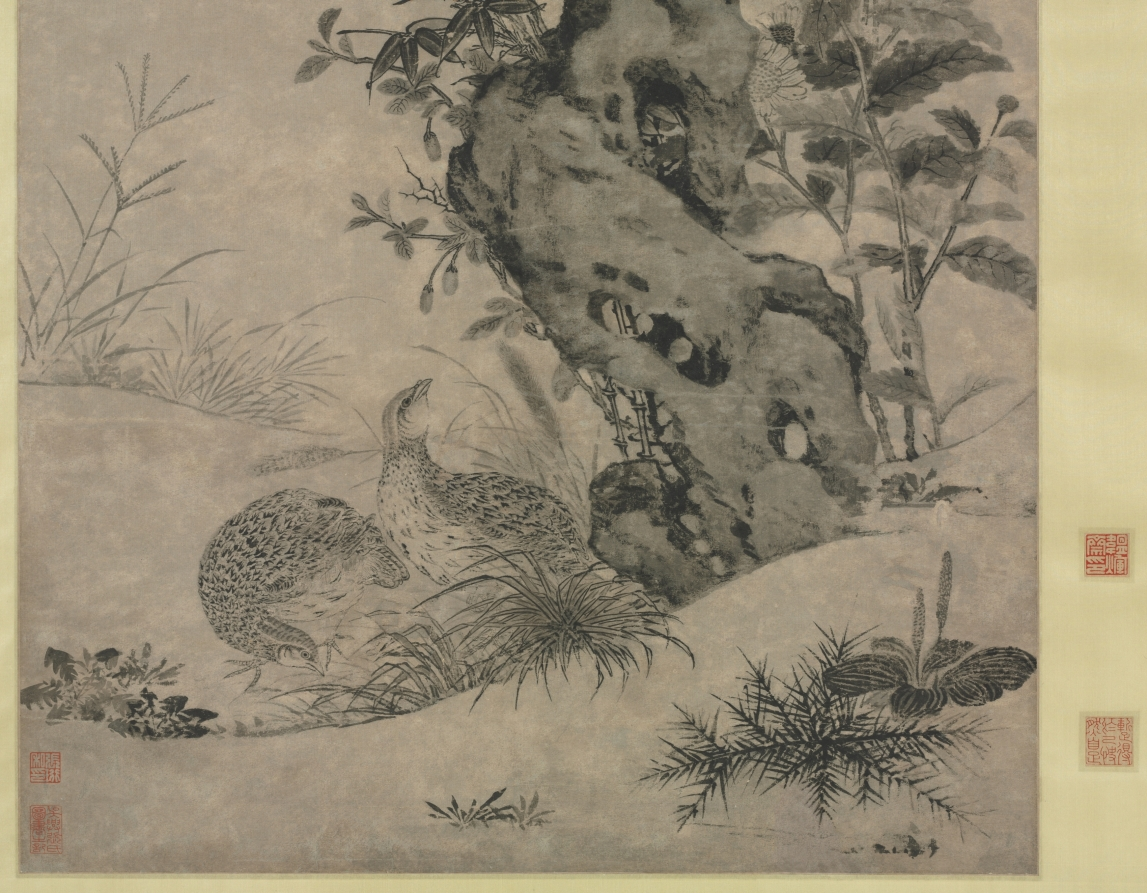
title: Quails and Sparrows in an Autumn Scene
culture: China, Yuan dynasty (1271-1368)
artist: Wang Yuan (Chinese, c. 1299-after 1366)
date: 1347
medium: hanging scroll, ink on paper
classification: Painting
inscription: 至正丁亥春 錢塘王淵若水寫秋景鶉雀圖 [印] 澹轩; [印] 若水; [印] 墨妙筆精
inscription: 翦翦輕風搖翠葆，團團清露滴金叢。 劍南畫手今何在，冷落賓榔枸杞新。 鐵篴 [印] 杨维桢印; [印] 廉夫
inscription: 1 inscription and 10 seals of the Qianlong emperor (r. 1736-95)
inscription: 4 seals of Zhang Heng 張珩 (1915-1963)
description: The flower-and-bird subjects here are depicted in a meticulous manner, echoing the academic tradition but translating the customarily colored images to plain monochrome. Fine ink lines combined with carefully graded washes define the contours and give subtle modeling to the natural forms. Wang Yuan excelled in flower-and-bird subjects as well as landscape and figure paintings. A child prodigy, he was instructed by the great Yuan master Zhao Mengfu at an early age.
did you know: Wang Yuan was from Qiantang, today’s Hangzhou in eastern China.